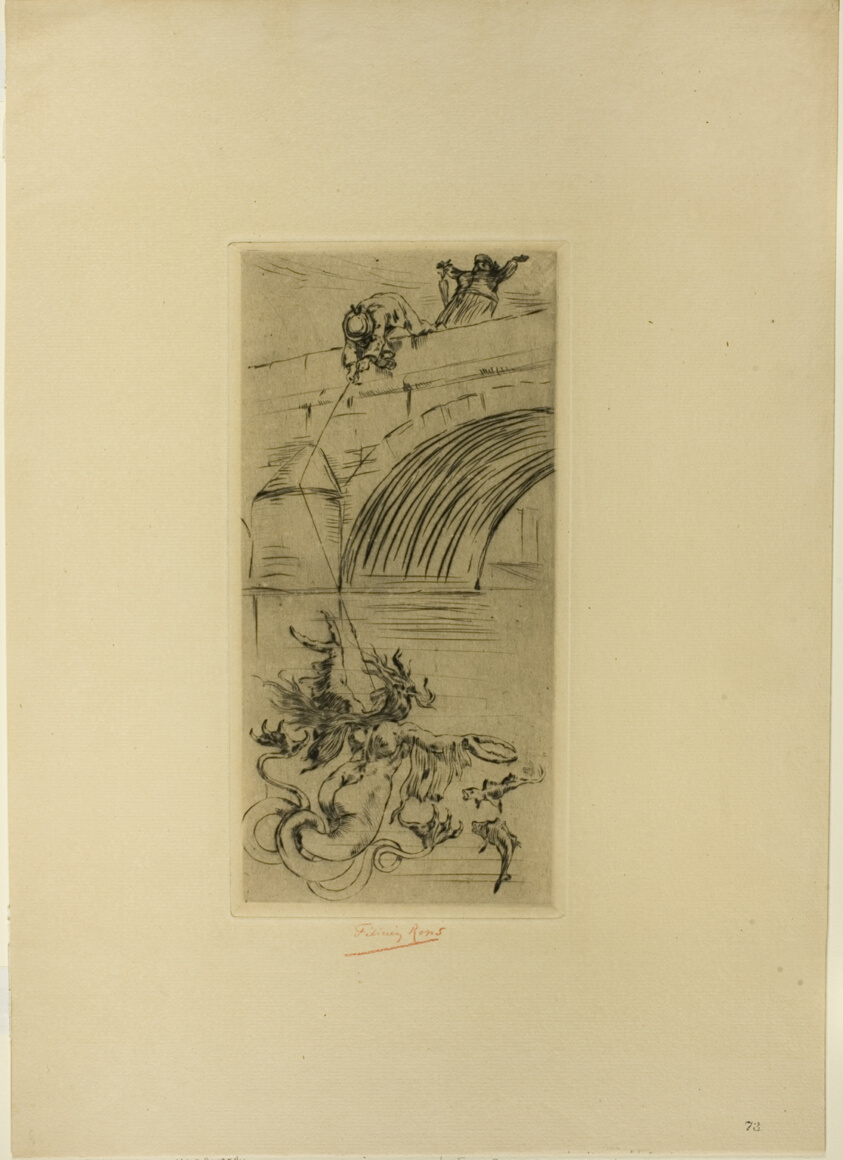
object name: Print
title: The Siren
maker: Félicien Rops (Belgian, 1833-1898)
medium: Etching and drypoint on cream laid paper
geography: Belgium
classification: etching; print; prints and drawing